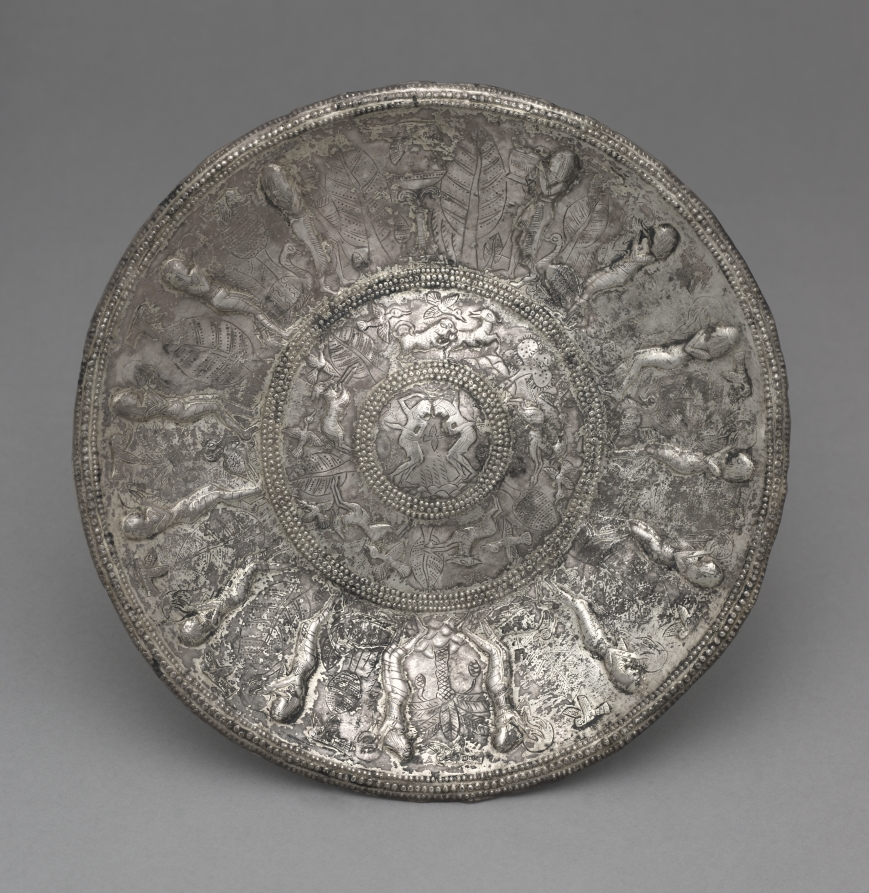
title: Dish with Tambourine Players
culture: Phoenicia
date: 700–600 BCE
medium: silver, partially gilt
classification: Metalwork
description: The Phoenicians lived on the coast of what is now Israel and Lebanon from about 1200 to 700 BC. Skilled sailors, traders, and craftsmen, they are best remembered today for having developed the basis of the Western alphabet. Their travels took them to Iran, where they bought silver, and to Egypt, where they bought ivory and acquired a taste for Egyptian artistic motifs. For example, many of their works of art include sphinxes and lotuses.